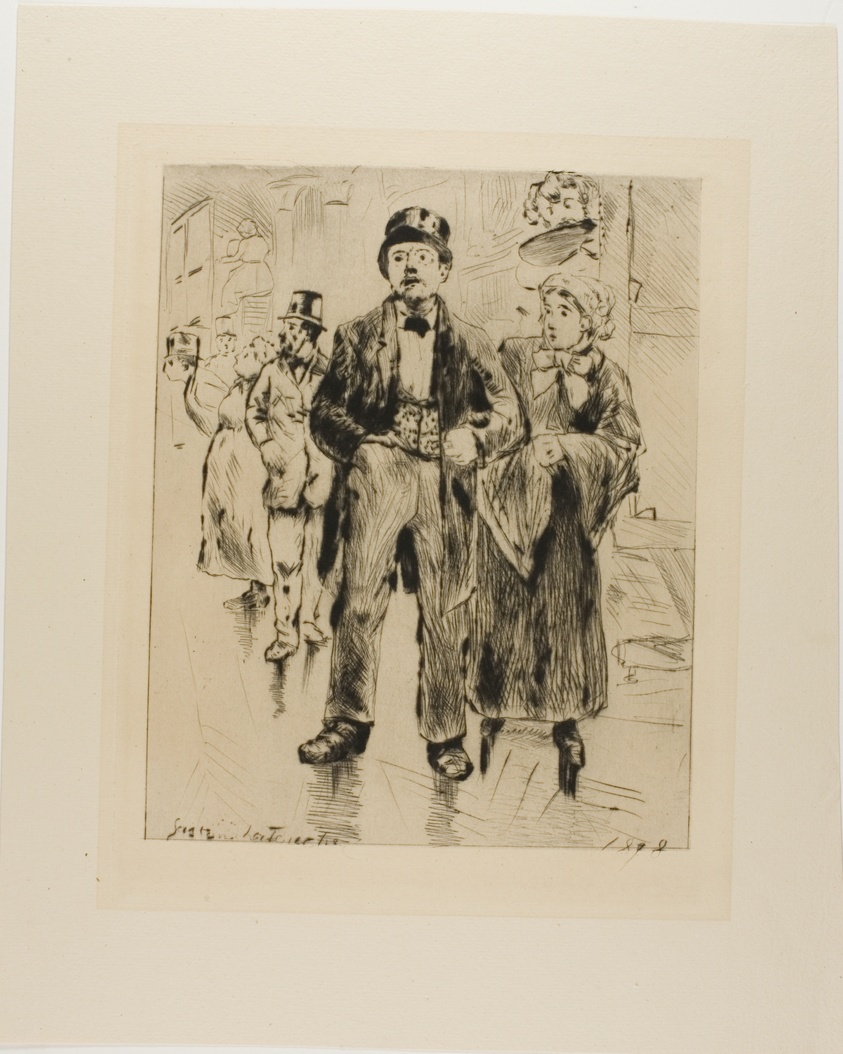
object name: Print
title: Plate from l'Assommoir (standing couple, with other figures in background)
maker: Gaston La Touche (French, 1854-1913)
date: 1878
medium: Drypoint on ivory laid paper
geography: France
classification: drypoint; print; prints and drawing